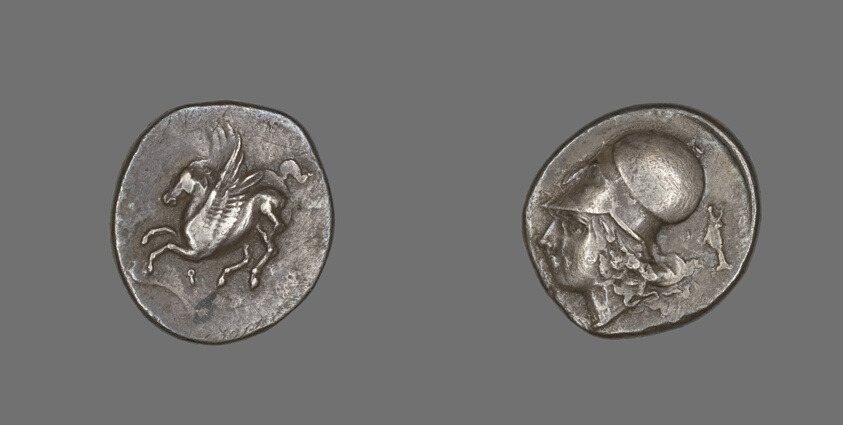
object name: Coin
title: Stater (Coin) Depicting Pegasus Flying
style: greek, ancient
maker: Greek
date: 4th-3rd century BCE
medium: Silver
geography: Corinth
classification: coin; ancient art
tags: mythological figures, gods (deities), pegasus